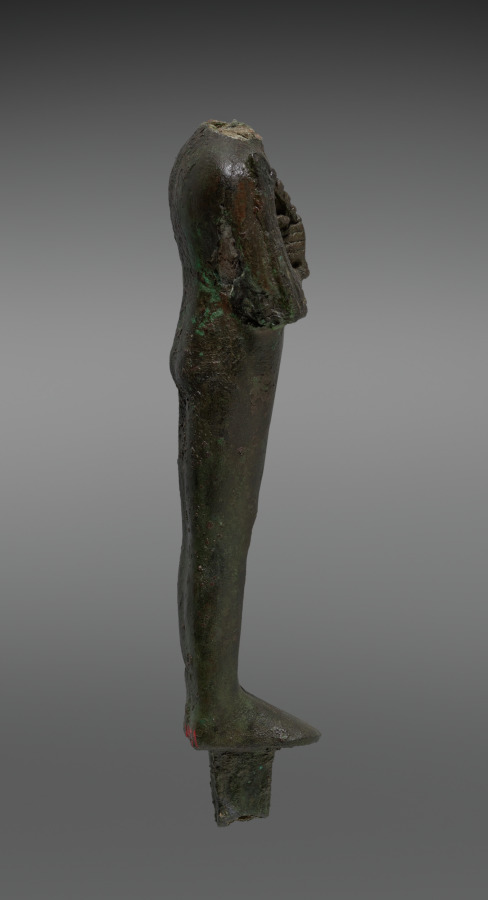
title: Statuette of Osiris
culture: Egypt, Late period (715–332 BCE), Dynasty 26 or later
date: 664–525 BCE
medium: black copper (?), hollow cast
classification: Sculpture